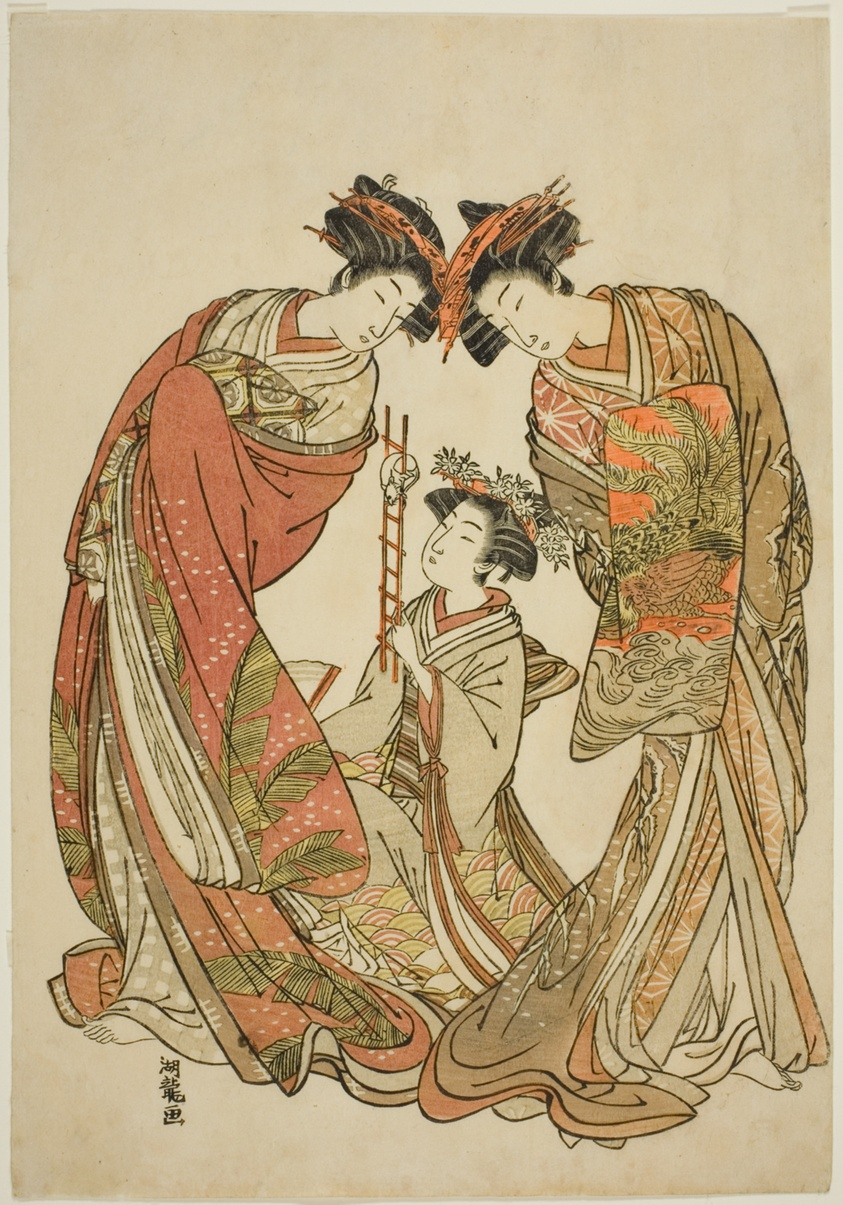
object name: Print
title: Two Courtesans Watching an Attendant Play with a Rat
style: Japanese (culture or style)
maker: Isoda Koryusai (Japanese, 1735-1790)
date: c. 1777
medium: Color woodblock print; aiban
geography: Japan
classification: woodblock print; print; asian art